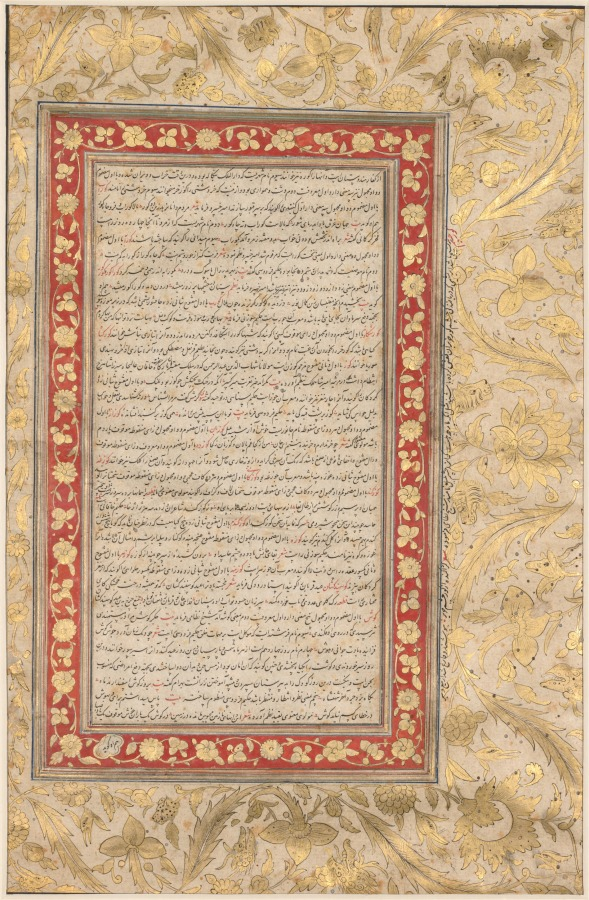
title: An Illuminated Folio from the Royal Manuscript of the Farhang-i Jahangiri (verso)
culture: Mughal India, court of Jahangir (1605–1627)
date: 1607–8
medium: Gum tempera, ink, and gold on paper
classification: Painting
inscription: Verso: “Gur” (name of a people in India) to “Gush” (morning east breeze, zephyr)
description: Farhang-i Jahāngīrī, one of the most complete and authoritative dictionaries of the Persian language, was compiled by Mir Jamal al-Din Husayn Inju. It took him 12 years to compile over 9,000 words with definitions and examples from verses by Persian poets. He was born in Shiraz, Iran, but lived most of his life in Agra, India, so the dictionary was named honor of the Mughal emperor Jahangir, who reigned from 1605 to 1627.